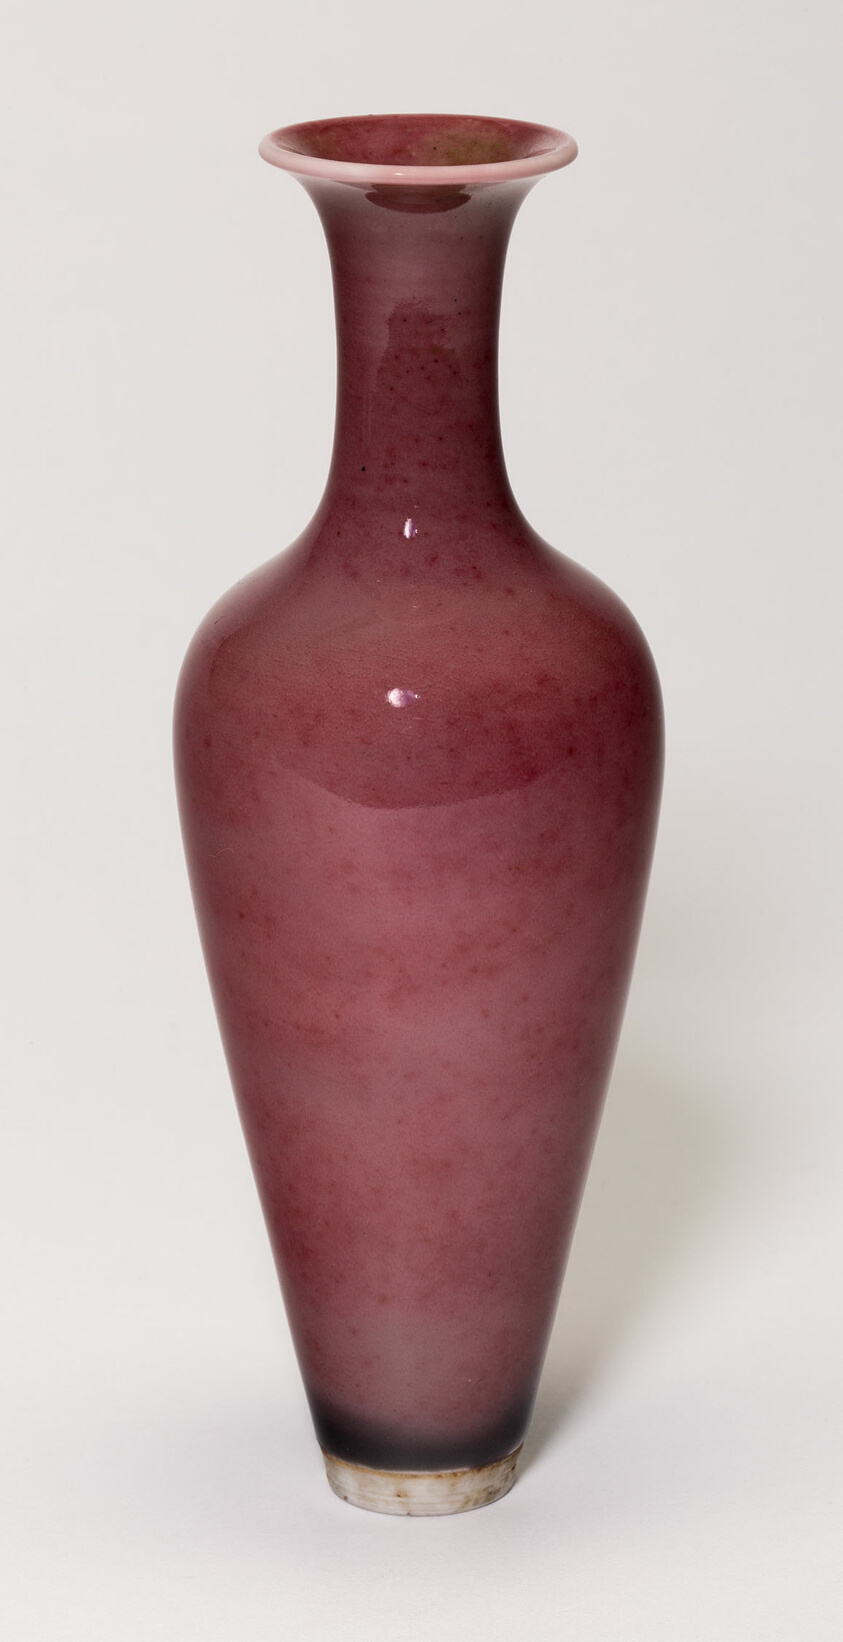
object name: Vessel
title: Vase with Eloganted Ovoid Shape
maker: China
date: Qing dynasty (1644–1911), Kangxi reign mark and period (1662–1722)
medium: Porcelain with copper red peachbloom glaze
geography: China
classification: porcelain; asian art; ceramics